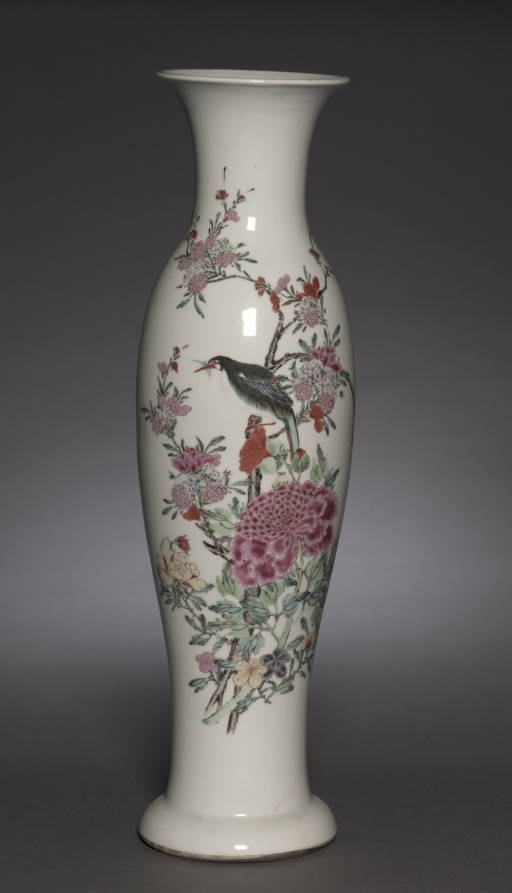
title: Vase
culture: China, Jiangxi province, Jingdezhen kilns, Qing dynasty (1644-1911), Yongzheng reign (1722-35)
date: 1723–35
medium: porcelain with famille rose overglaze enamel decoration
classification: Ceramic